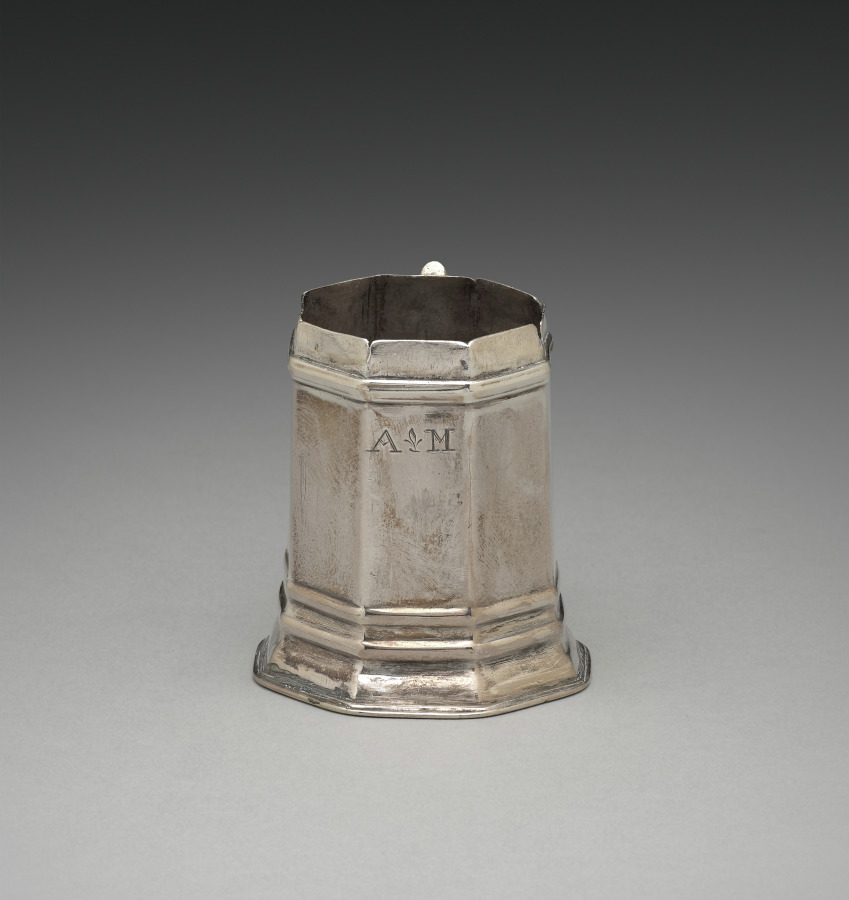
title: Caster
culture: America, Massachusetts, Boston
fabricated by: Andrew Tyler (American, 1692–1741)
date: c. 1720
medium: silver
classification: Silver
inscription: engraved: "M" over "D * L" in shaded block letters on bottom, and "AM" in block letters on front, opposite handle.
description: A caster was used to spread a finely ground substance, probably pepper.